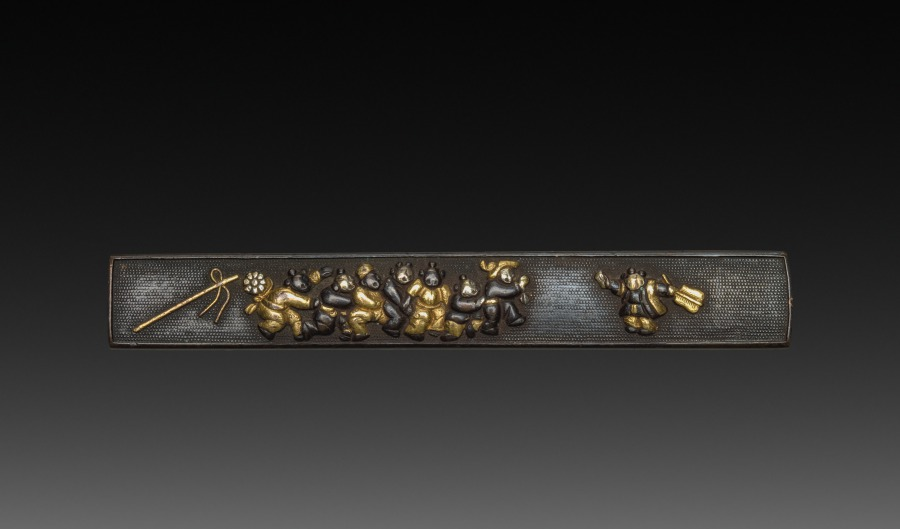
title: Knife Handle (Kozuka)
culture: Japan, Edo period (1615–1868)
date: c 1800s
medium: inlaid bronze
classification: Metalwork